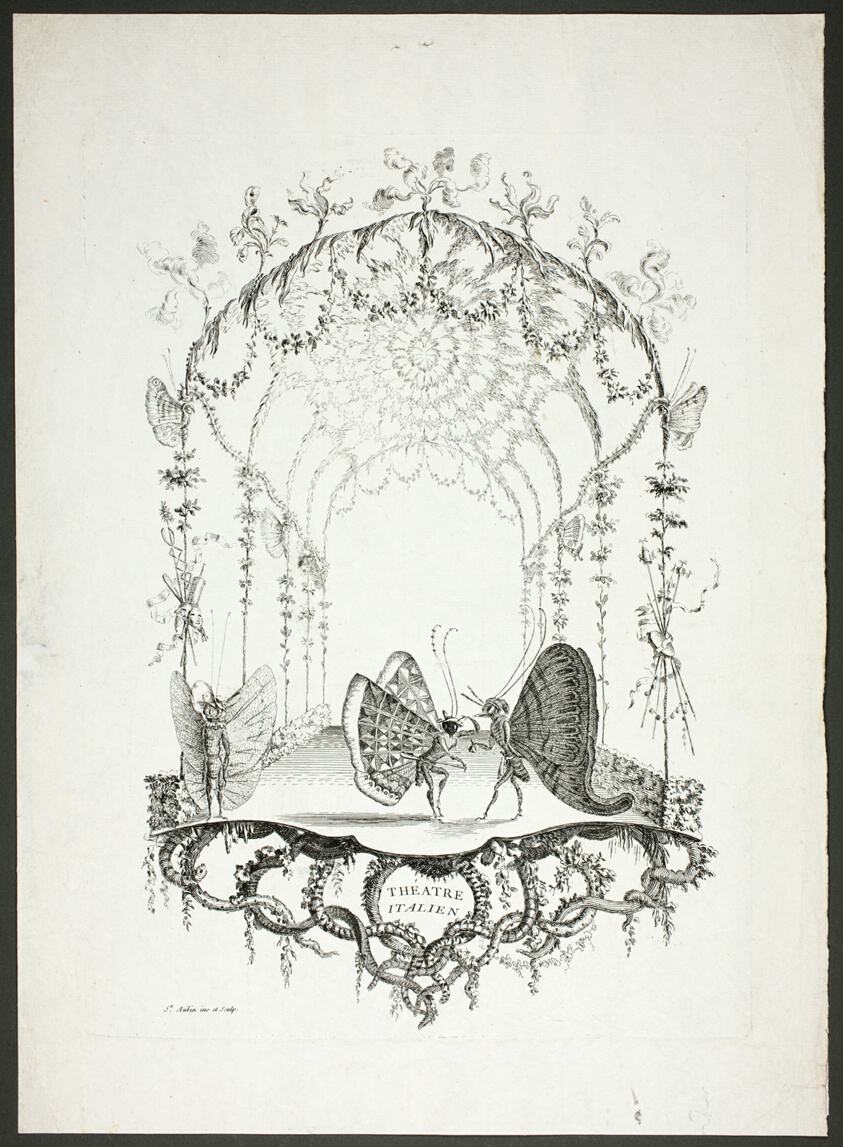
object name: Print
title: Butterflies on the Stage or Italian Theater, from Sample of Human Butterflies by Saint Aubin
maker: Charles Germaine de Saint-Aubin (French, 1721-1786)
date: 1756/60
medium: Etching in black on ivory laid paper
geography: France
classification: etching; print; prints and drawing